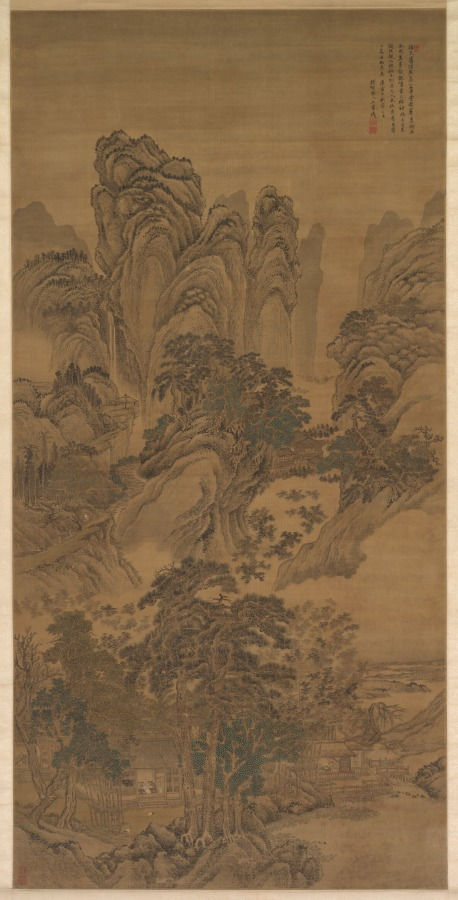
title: Landscape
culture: China, Qing dynasty (1644-1911)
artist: Wang Hui (Chinese, 1632–1717)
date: 1632–1717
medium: hanging scroll, color on silk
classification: Painting